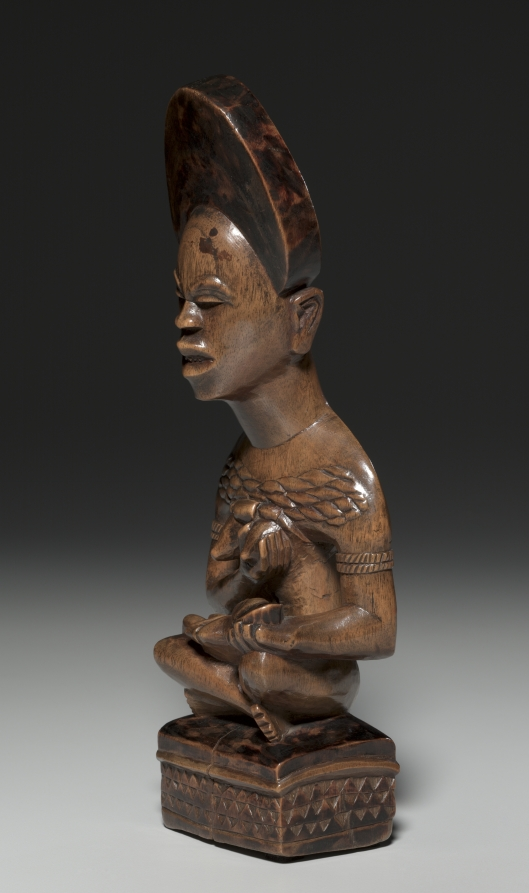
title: Woman and Child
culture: Africa, Central Africa, Democratic Republic of Congo, Yombe-style carver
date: mid- to late 1800s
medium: Wood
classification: Sculpture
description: This mother-and-child figure was probably part of a cult concerned with the treatment of infertility. Both her jewelry and her seated pose indicate that the woman occupied a high rank in her community. Her miter-shaped hairstyle, chiseled teeth, and raised body scars--considered to be marks of beauty and perfection--signal that the woman incarnates the founding ancestor of a kinship group.